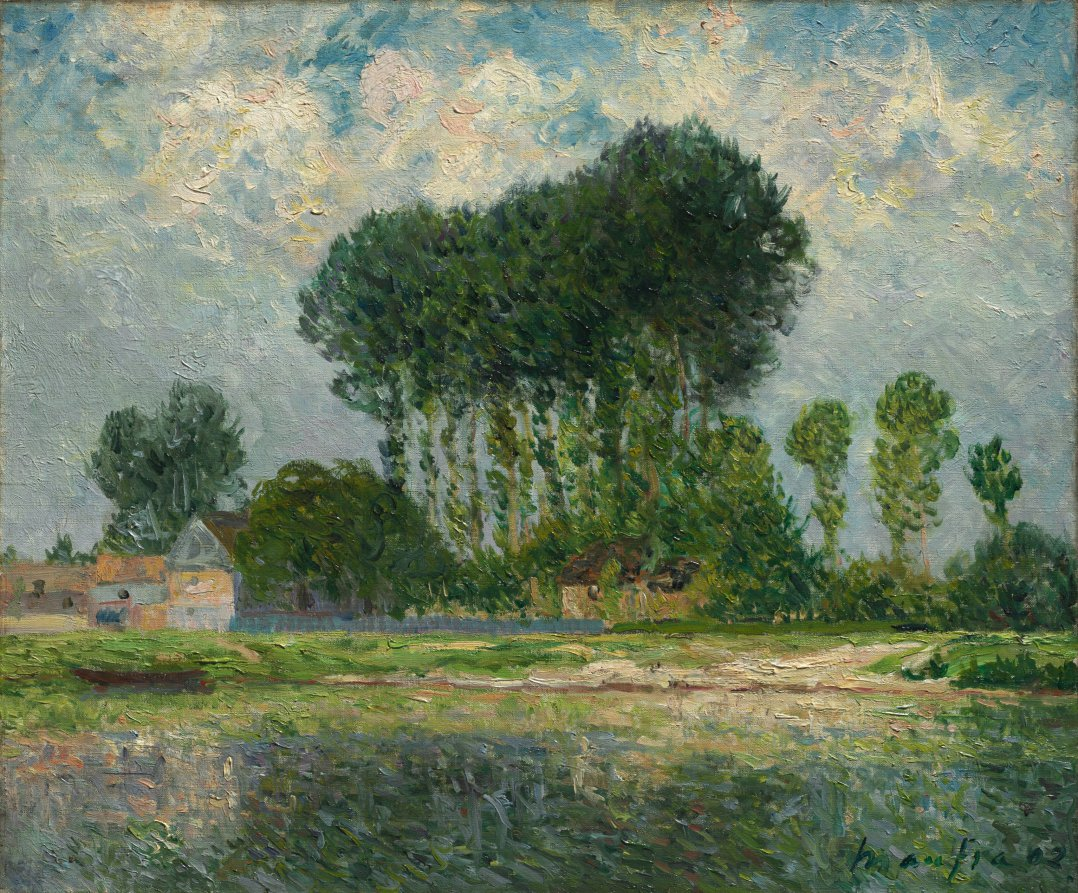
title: The River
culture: France, 19th century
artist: Maxime Maufra (French, 1861–1918)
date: 1902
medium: oil on fabric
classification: Painting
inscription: Signed lower right: Maufra 02